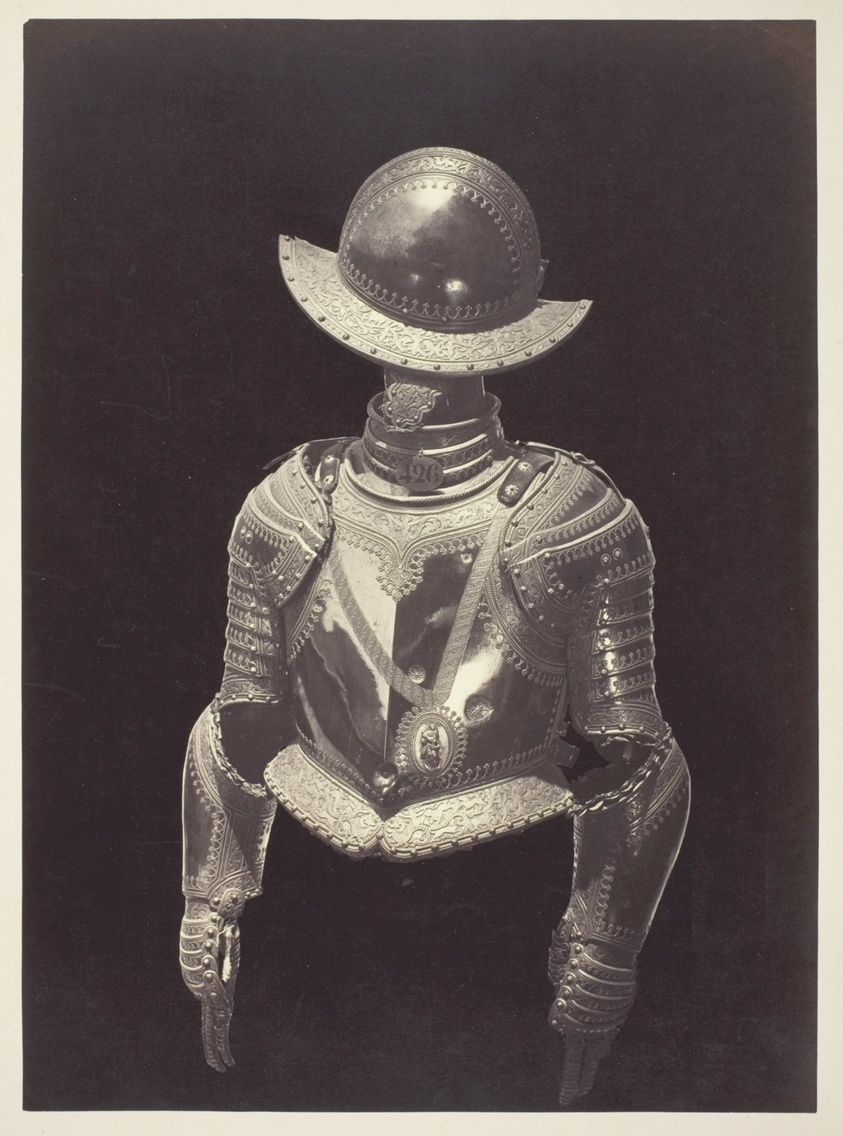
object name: Photograph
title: Musket-Proof Half Armor of King Philip III (Media Armadura a Prueba de Mosquete del Rey Felipe III)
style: 19th century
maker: Juan (Jean) Laurent; French, active in Spain, 1816–1886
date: c. 1868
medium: Albumen print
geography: France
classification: photography; albumen silver print; photograph